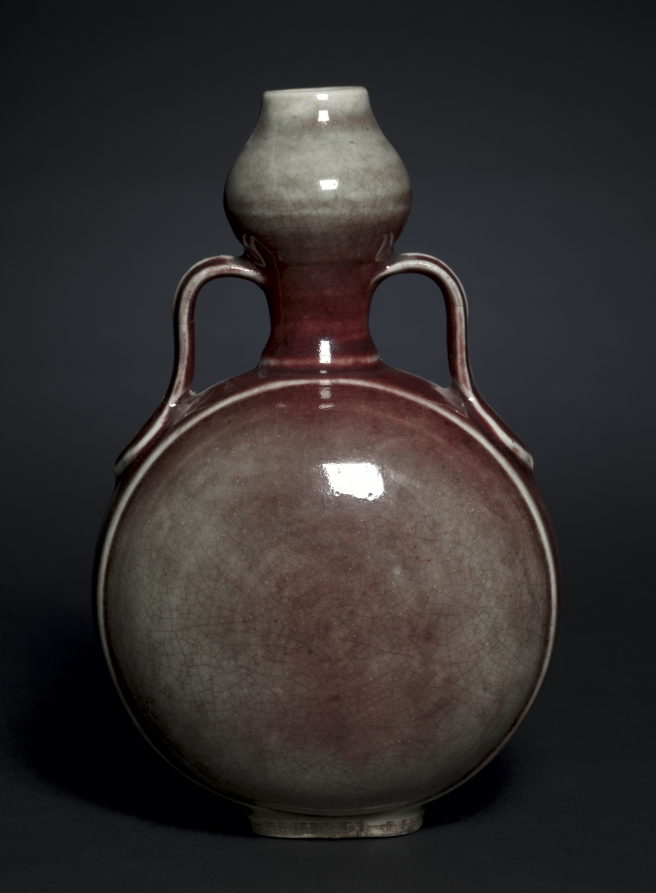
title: Gourd Flask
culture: China, Jingdezhen, Jiangxi province, Qing dynasty (1644–1911), Kangxi reign (1662–1722)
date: 1662–1722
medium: porcelain, Lang ware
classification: Ceramic